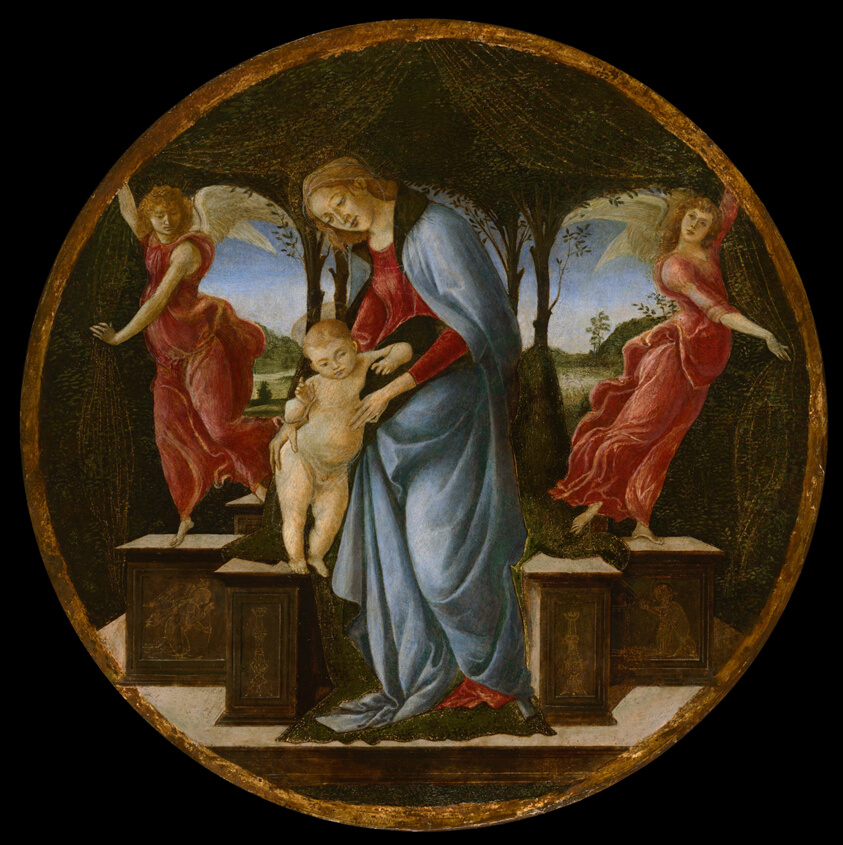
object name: Painting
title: Virgin and Child with Two Angels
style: 15th century, Renaissance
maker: Sandro Botticelli (Italian, 1444/45–1510)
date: c. 1490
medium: Tempera on panel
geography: Italy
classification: painting; Italian; paint; tempera; european painting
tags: Virgin and child/Madonna and child, Jesus, religious, religion, Christianity, Christian subjects, woman with children, landscape, angels, Madonna, Century of Progress, world's fairs, Chicago World's Fairs